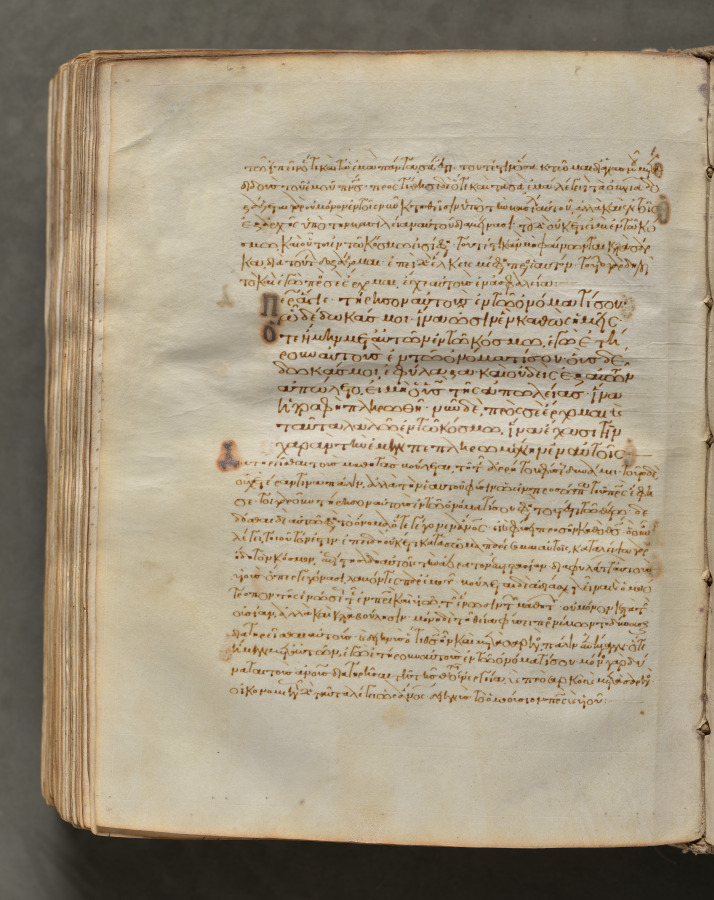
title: Text, folio 404 (verso), from a Gospel Book with Commentaries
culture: Byzantium, Constantinople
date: c. 1000–1100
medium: ink, tempera, and gold on vellum; leather binding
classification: Bound Volume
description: Each of the four gospels in this book opens on a page with brilliantly illuminated borders depicting the author of the text as well as birds—principally peacocks, symbols of the immortality of the soul—and fountains, representing the fountain of life and the salvation of the soul. This volume consists of 428 leaves with texts in Greek. Its level of sophistication suggests that it was probably written and decorated in a monastery in Constantinople.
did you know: Gospel books were carried in procession through Byzantine churches.